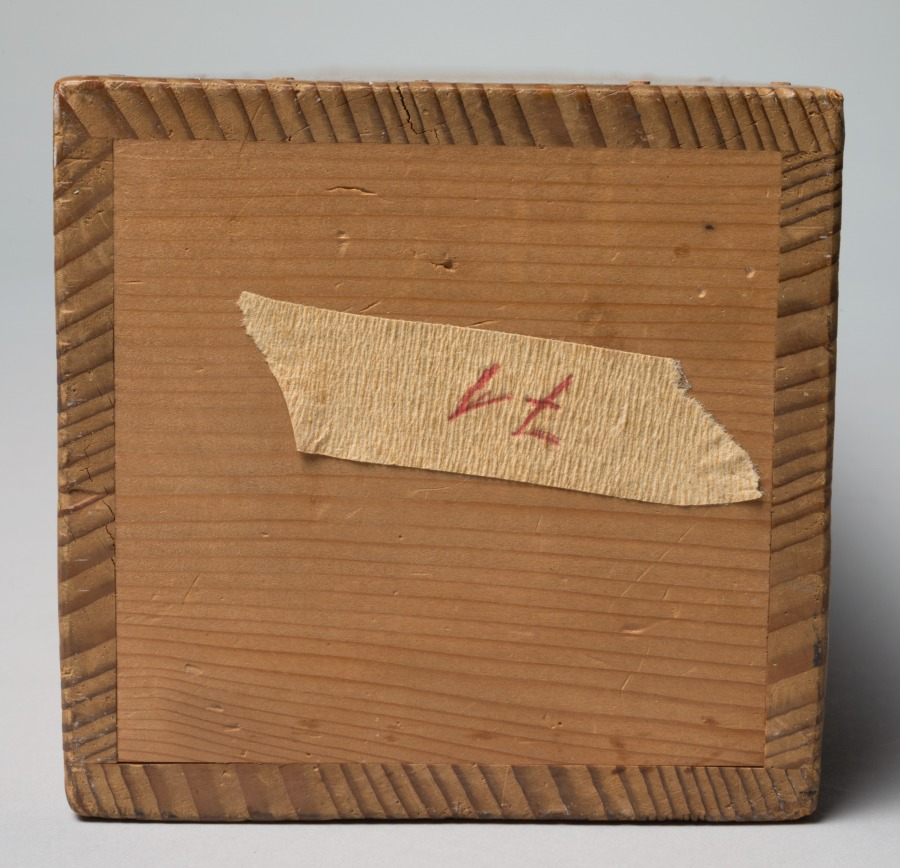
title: Playing the "Hand Game"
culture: Japan, Edo period (1615–1868)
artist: Hasegawa Yasumasa (Japanese)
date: c. 1760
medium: hanging scroll; ink and color on paper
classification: Painting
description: This scene depicts three people playing a game in which three players make hand gestures simultaneously. The relationship among the gestures determines the winner. Known as hand games, during the eighteenth century they were popular in Japan among courtesans. In this version, the contestants use both hands, indicating a special variation such as the fox hand game, which features gestures for a fox, a village leader, and a hunter.